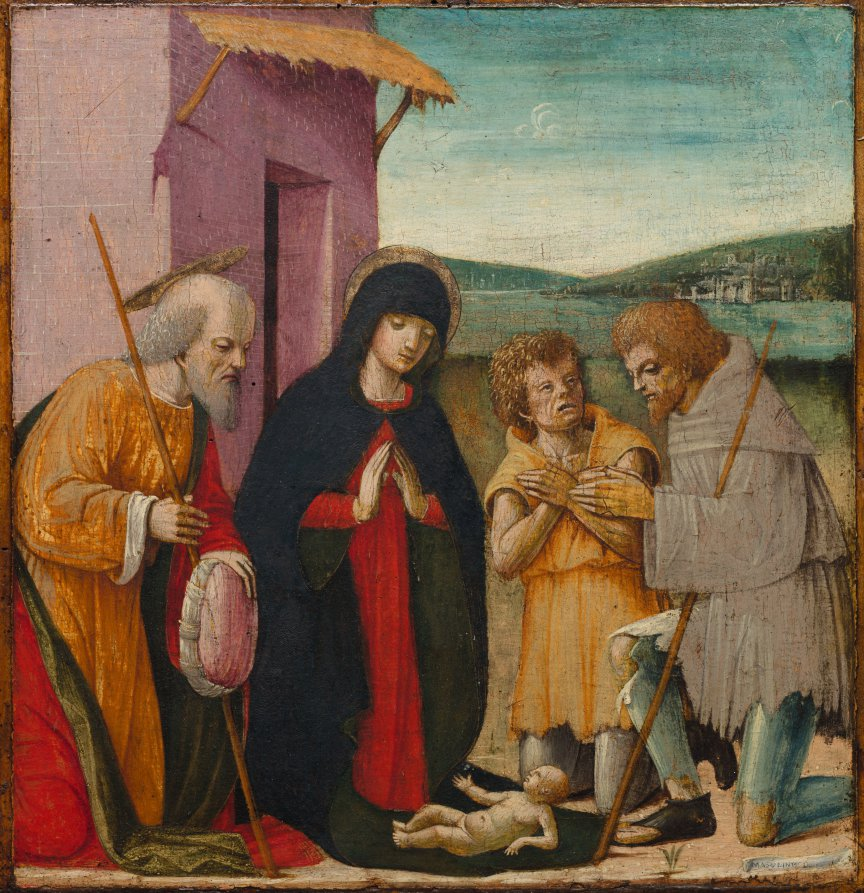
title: Adoration of the Shepherds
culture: Italy, 15th century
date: c. 1480–1500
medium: oil on wood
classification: Painting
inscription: annotated lower right: MASOLINUS